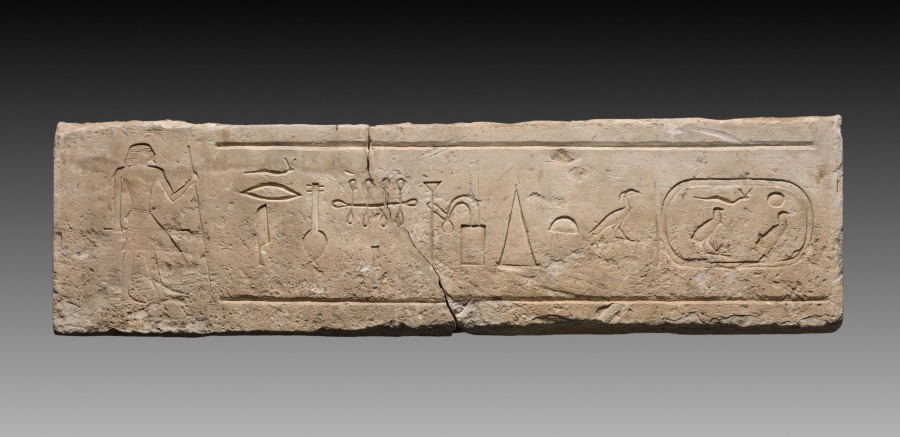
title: Lintel of Neferi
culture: Egypt, Giza, western cemetery, excavations of Montague Ballard, 1901–2, Old Kingdom (2647–2124 BCE), Dynasty 6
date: 2311–2140 BCE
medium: limestone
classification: Sculpture